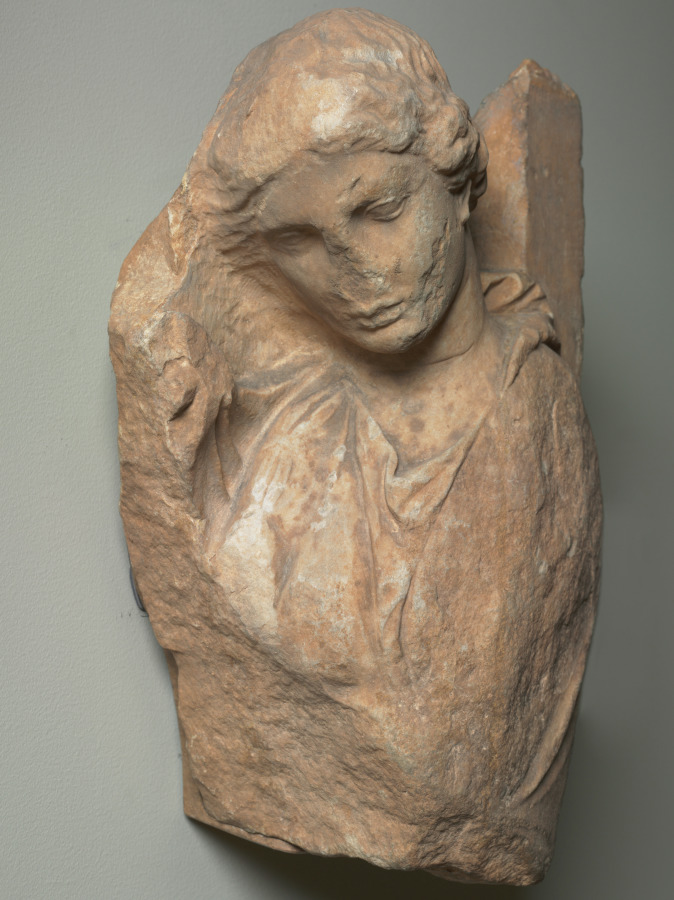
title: Grave Stela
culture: Greece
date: 400–350 BCE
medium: pentelic marble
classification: Sculpture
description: Carved in high relief, the original composition of this Attic grave marker can be reconstructed by comparison with the famous stele of Hegeso in Athens. With downcast eyes, the seated matron is dressed in a himation (cloak). Much of the lintel above is missing. It would have included an inscription with her name. The deceased is represented in a common domestic setting. The mood is somber and contemplative without any overt expression of mourning.